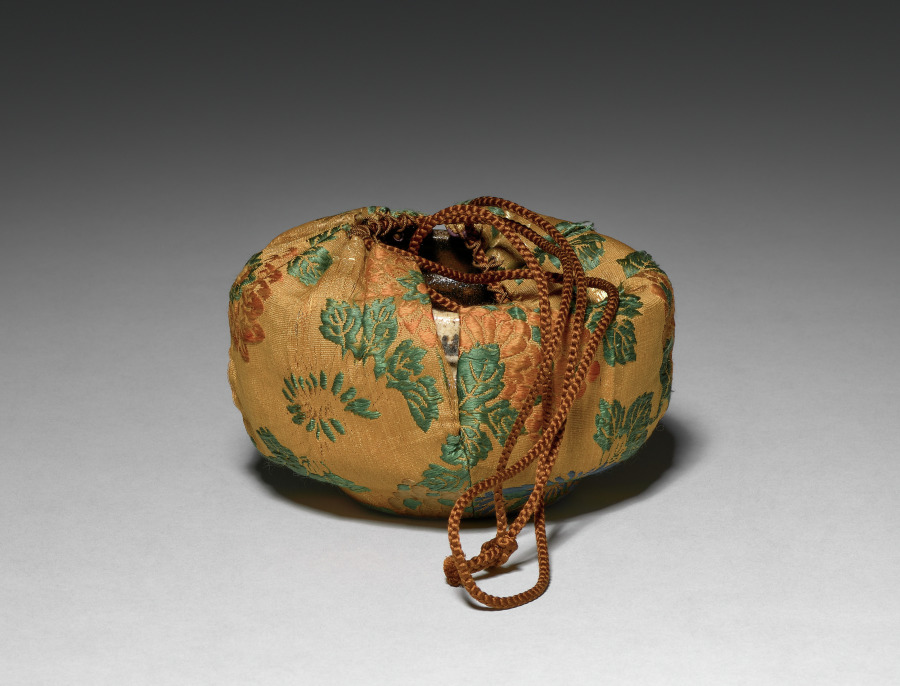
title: Clog-shaped Teabowl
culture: Japan, Momoyama period (1573–1615)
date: early 1600s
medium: Glazed stoneware (Mino ware, Oribe type)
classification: Ceramic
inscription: Mark: cross on base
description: Tea gatherings are fundamental to Japanese culture. Teabowls like this one are the most important objects used in tea practice. Its oblong shape and bold abstract designs are the signature style of the time period in which it was produced. That style is called Oribe, named for the tea master who championed the aesthetic.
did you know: Oribe is a government position. It means the person in charge of textiles.